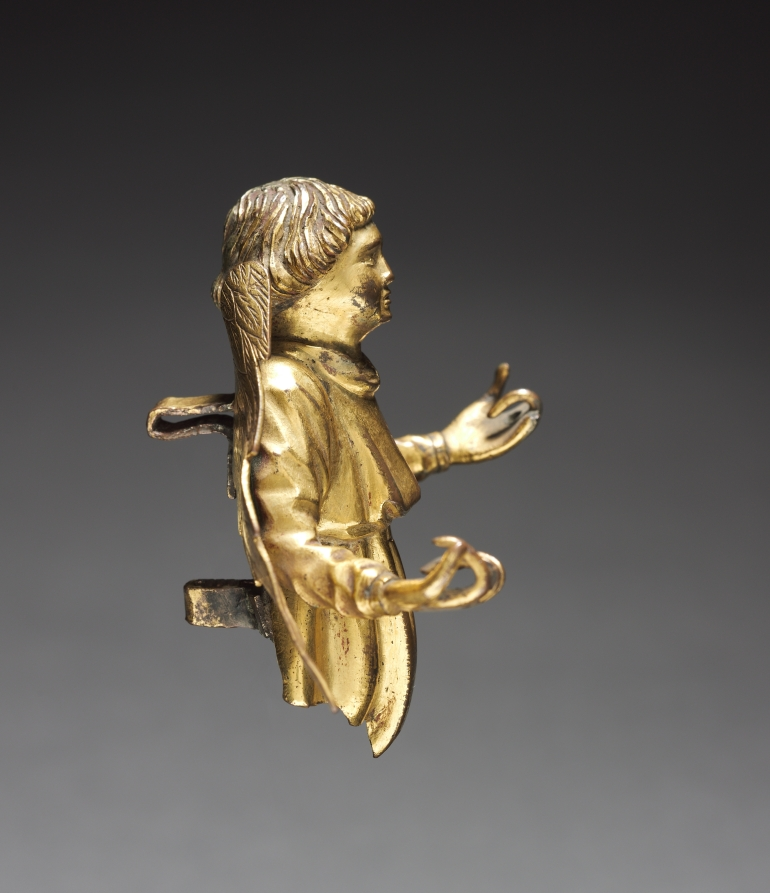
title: Angel from an Architectural Reliquary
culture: Franco-Netherlands or Paris, 15th century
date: c. 1400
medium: gilt bronze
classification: Sculpture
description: This beautiful Gothic angel is probably a surviving element from a large architectural reliquary. The last clue to its lost context disappeared when the symbolic attribute was twisted from the angel’s fingers, possibly during the destructive zeal of the French Revolution. The technique and style are characteristic of the lay workshops employed by the Valois courts during the early 1400s.